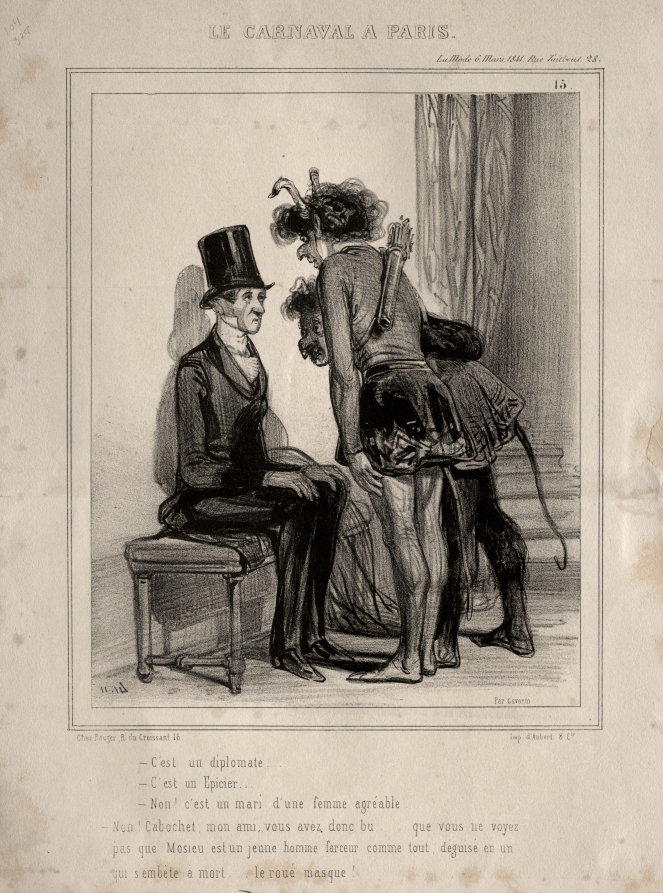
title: Carnaval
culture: France, 19th century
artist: Paul Gavarni (French, 1804–1866)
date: 1841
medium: lithograph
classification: Print